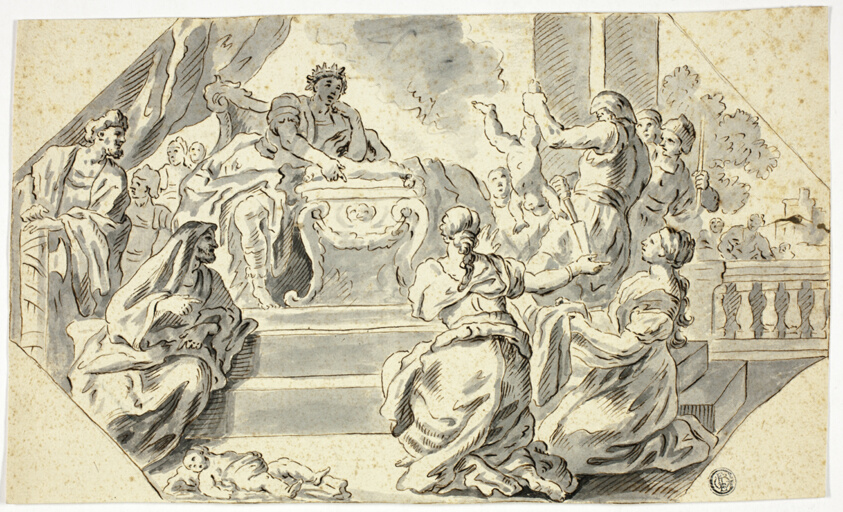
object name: Drawing and Watercolor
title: Judgement of Solomon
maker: School of Francesco Solimena (Italian, 1657-1747)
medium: Pen and brown ink, with brush and gray wash, with traces of black chalk, on ivory laid paper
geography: Italy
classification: pen and ink drawings; drawings (visual works); prints and drawing